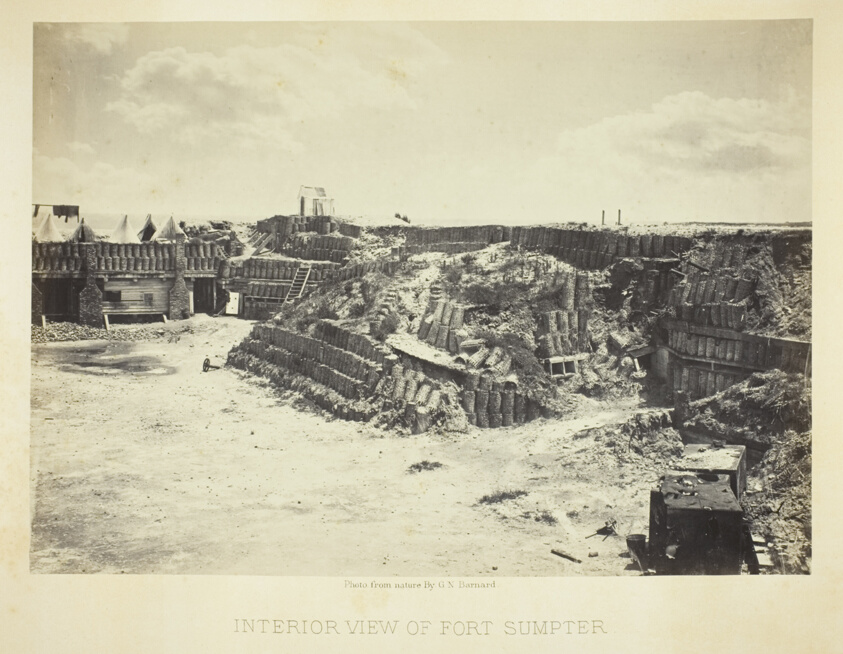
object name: Photograph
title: Interior View of Fort Sumpter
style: 19th century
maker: George N. Barnard (American, 1819–1902)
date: 1866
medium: Albumen print, plate 57 from the album "Photographic Views of the Sherman Campaign" (1866)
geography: United States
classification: albumen silver print; photographic process; photography; photograph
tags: Collected by Hugh Edwards, Sherman's Campaign 1866